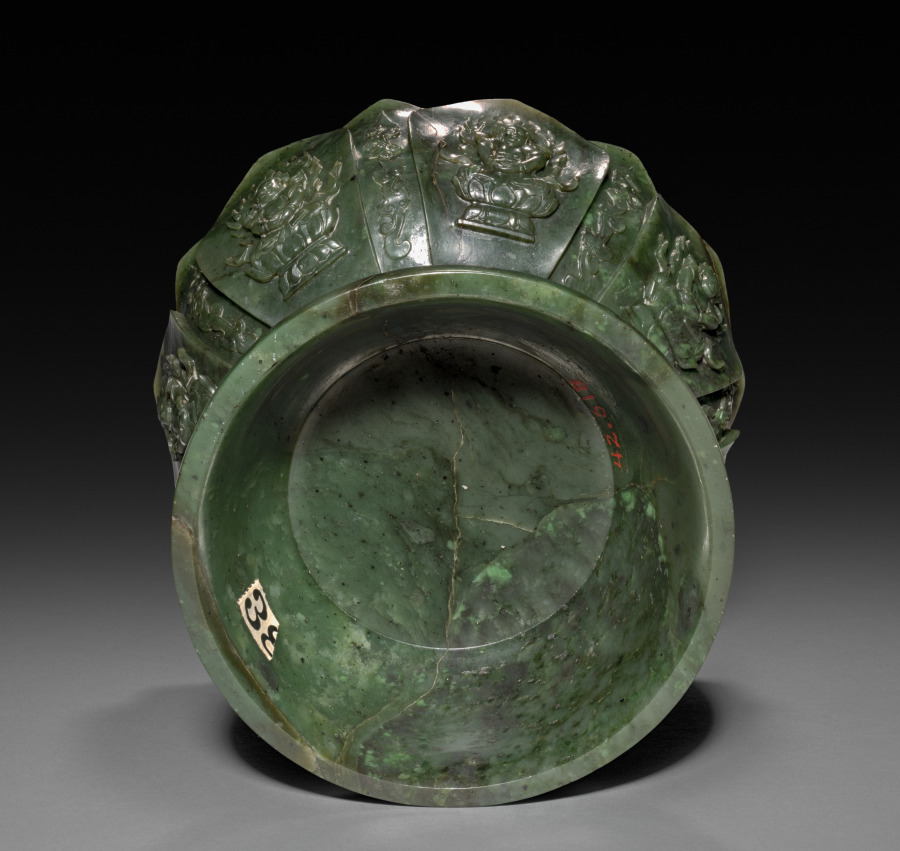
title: Offering Container in Form of Alms Bowl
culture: China, Qing dynasty (1644-1911)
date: 1700s or later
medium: jade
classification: Jade